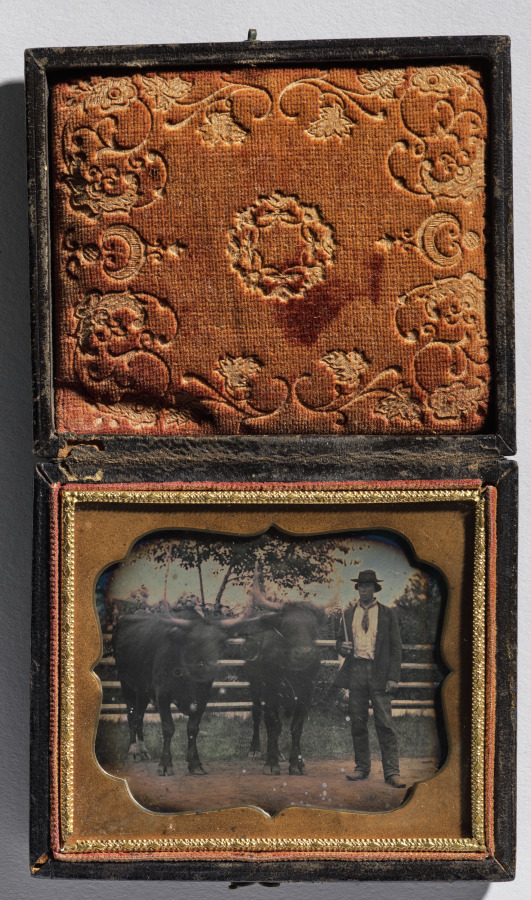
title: Two Oxen and Driver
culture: America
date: 1850s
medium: daguerreotype, sixth plate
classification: Photograph